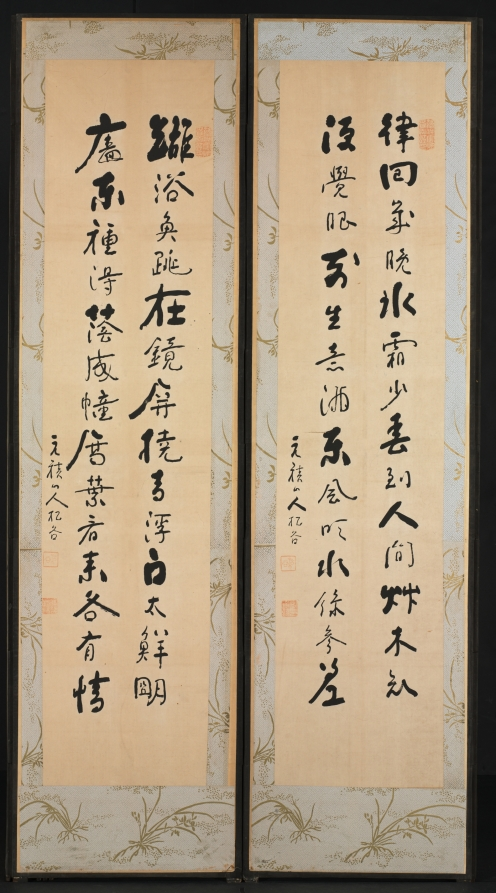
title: Painting of One Hundred Themes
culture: Korea, Joseon dynasty (1392–1910)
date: late 1800s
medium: Ten-panel folding screen affixed with album leaves (obverse), calligraphy (reverse), ink and color on silk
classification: Painting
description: The front of this screen features an assortment of subjects: birds and flowers, landscapes, and scenes of everyday life, mostly in monochromatic ink with light colors. The screen’s reverse side conveys a number of classical poems about the fleeting beauty of the four seasons. Traditionally, only one side of a folding screen bears painted or embroidered images, since these were used as a background furnishing. In Korean houses by the 1800s and early 1900s, however, two-sided folding screens became noticeably popular, possibly inspired by Japanese double-sided folding screens, which mainly served as room dividers in Japanese households.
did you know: The way of displaying small images of various subjects became one of the most popular type of painting toward the end of the 19th century.